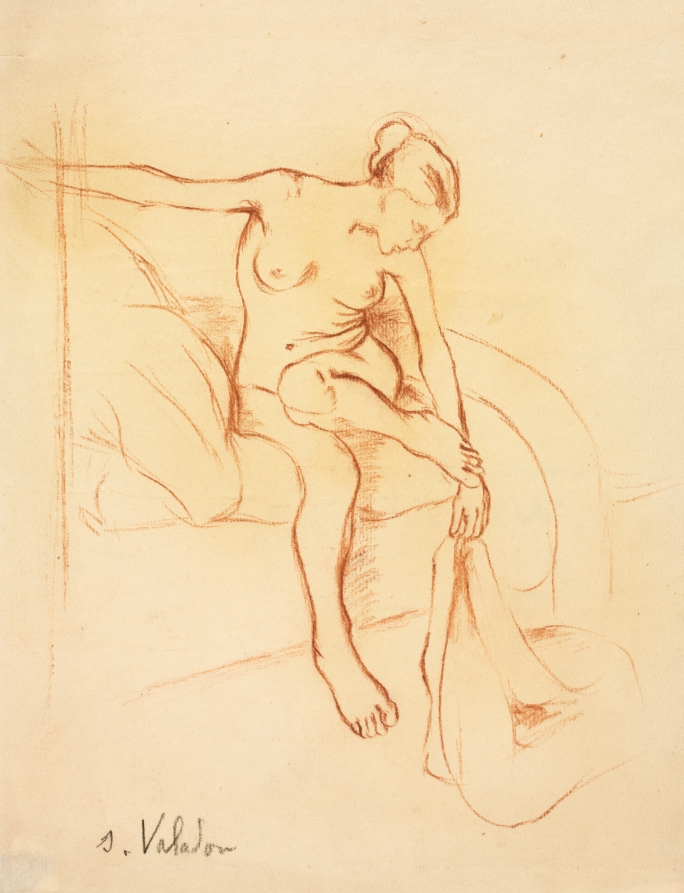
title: Nude Woman Seated on a Bed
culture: France, 20th century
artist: Suzanne Valadon (French, 1865–1938)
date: first third 20th century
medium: red chalk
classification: Drawing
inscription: signed, lower left, in black crayon: S. Valadon ; lower left, in graphite: so ; lower right, in graphite?: [illegible] 400 [illegible] [partially erased] ; lower right, in graphite: 40- ; VERSO, lower left, in graphite: 4005 [sideways]